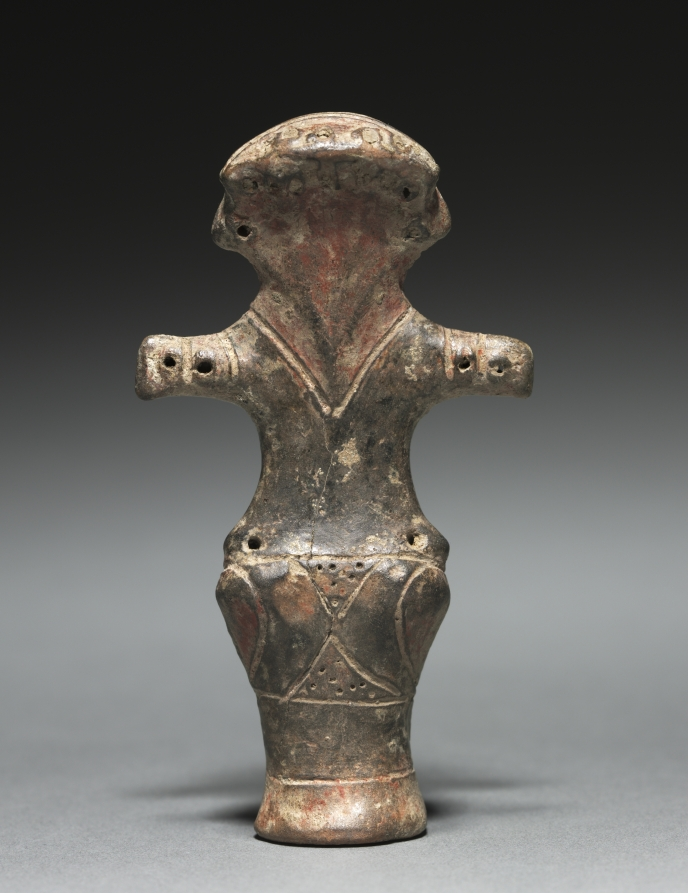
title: Vinca Idol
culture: Serbia, Vinça culture, Neolithic Era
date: 4000 BCE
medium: fired clay with paint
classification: Ceramic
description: This statuette, probably a cult idol, dates to the Neolithic Era which saw the development of farming and human technology. It is extraordinarily well preserved and derives from the settlement at Vinca in modern Serbia. This flourishing culture was the largest known in Europe at that time, extending along the Danube into the Balkans and Central Europe. Thousands of clay statuettes have been discovered in the region's Vinca settlements suggestive of the intense magic-religious practices within the Vinca culture. This statuette is anthropomorphic, or human-shaped, and is presumed to have been used for ritual purposes. The use of red paint is typical of Vinca Neolithic figurines, and few have survived in such excellent condition.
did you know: This figurine depicts a female deity with a protruding belly and plump buttocks.